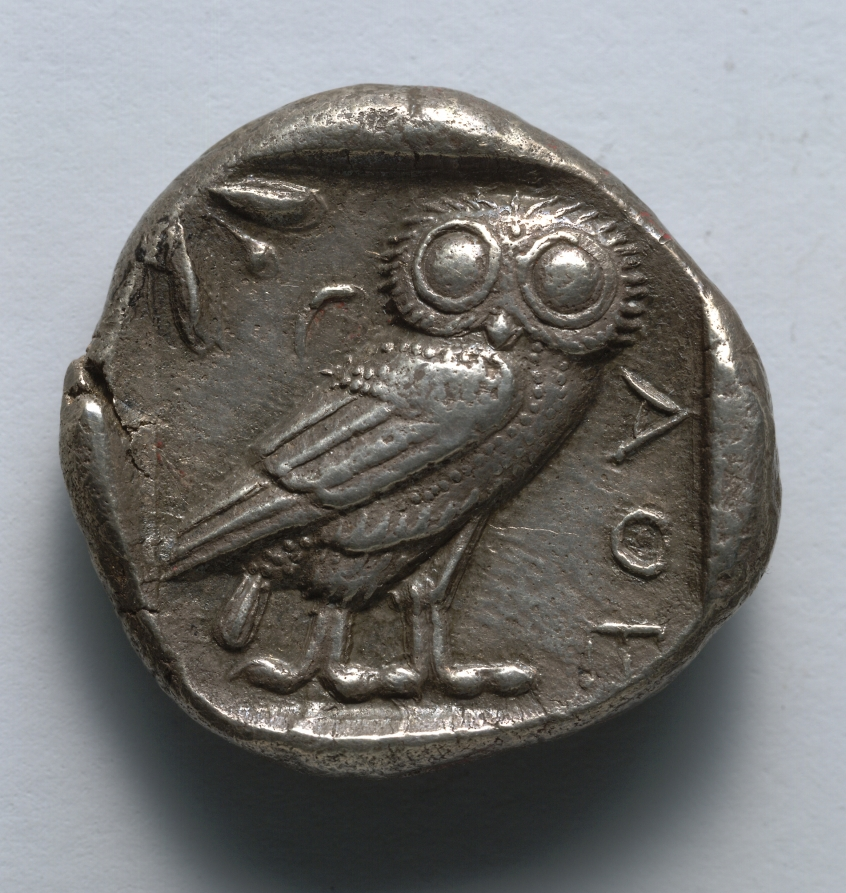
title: Tetradrachm: Owl (reverse)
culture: Greek, minted at Athens (Attica)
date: 449–407 BCE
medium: silver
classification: Coins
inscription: ΑΘΕ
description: Incorporating the first three letters of the city name—ΑΘΕ—with then-iconic images of the patron goddess Athena and her owl, the Athenian tetradrachm was among the most widely traded and most recognizable coins of the ancient world. The olive leaves on Athena’s helmet and the small crescent moon behind the owl date this coin after the Persian Wars.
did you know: The basic design of Athenian tetradrachms is now back in use, on Greek one-Euro coins.